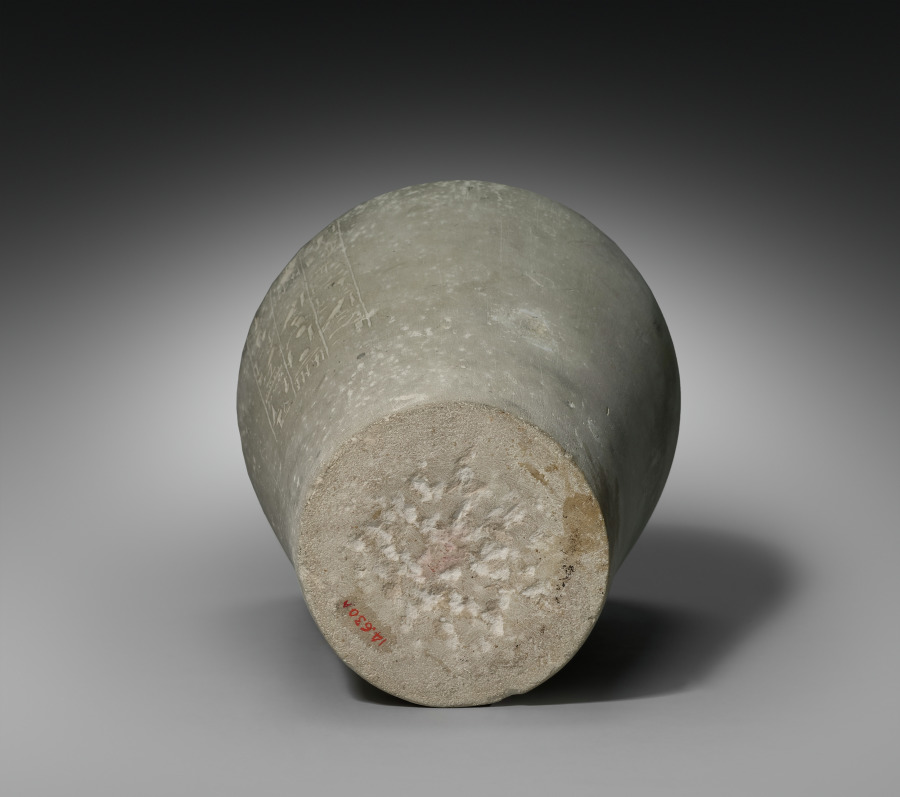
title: Canopic Jar with Lid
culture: Egypt, New Kingdom (1540–1069 BCE), Dynasty 18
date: 1540–1296 BCE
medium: limestone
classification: Funerary Equipment